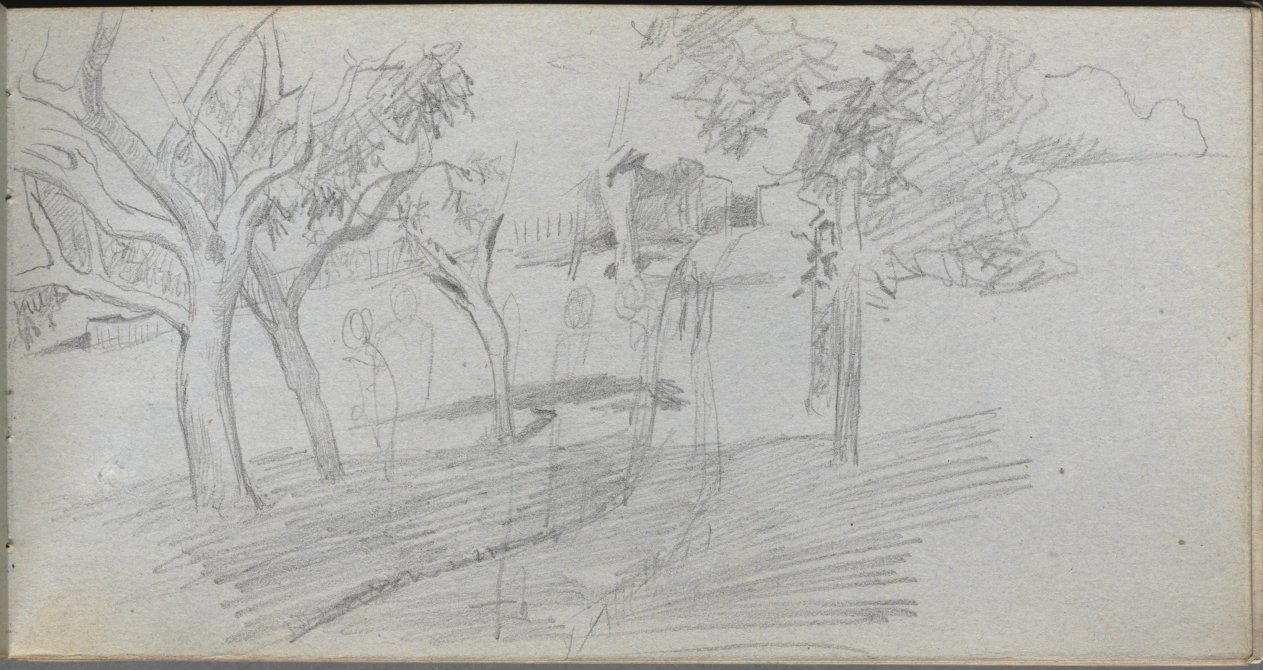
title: Sketchbook, page 74: Landscape Study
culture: France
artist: Ernest Meissonier (French, 1815–1891)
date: c. 1860s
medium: graphite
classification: Bound Volume